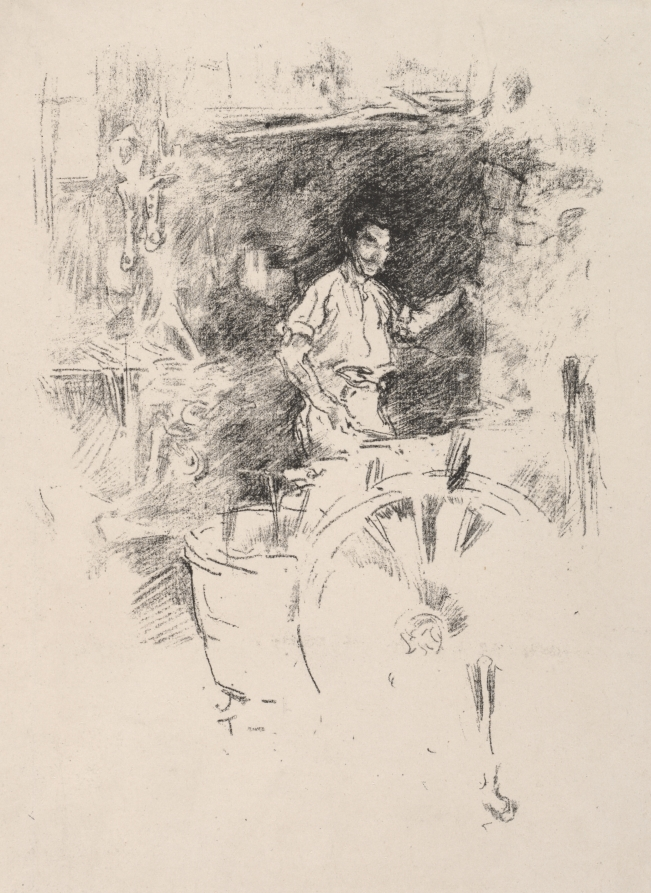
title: The Blacksmith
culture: America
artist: James McNeill Whistler (American, 1834–1903)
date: 1895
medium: lithograph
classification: Print